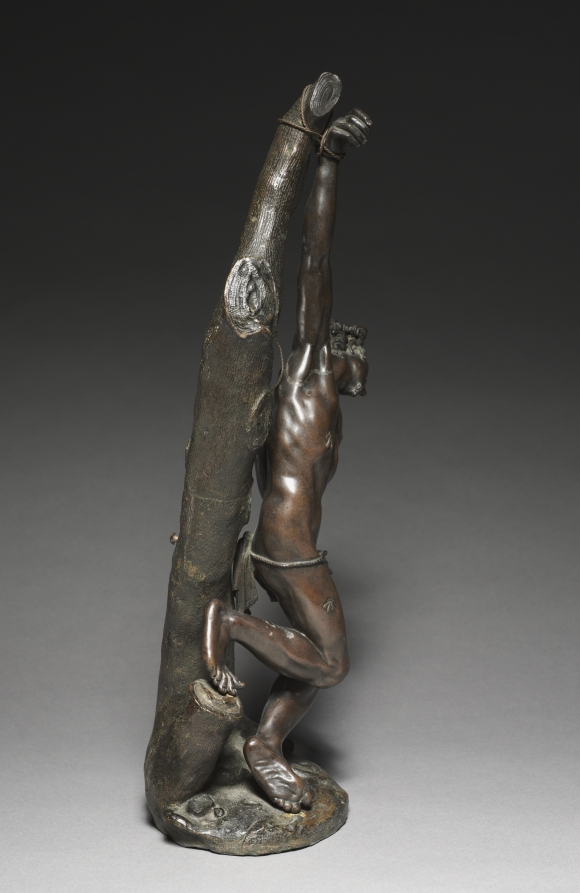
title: Saint Sebastian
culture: Germany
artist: cast after a model probably by Georg Petel (German, c. 1601-c. 1634)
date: 1620s or later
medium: bronze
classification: Sculpture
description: This composition is the subject of an ongoing attribution debate. The design is adapted from a painting by Adam Elsheimer, a German artist working Rome. This sculptural model exists in many versions; however, they vary considerably in their execution, complicating the identification, because they were clearly not made by a single sculptor or workshop. However, Georg Petel probably first created the design as he traveled across Italy in 1620–24, where his portrait was painted holding this composition.